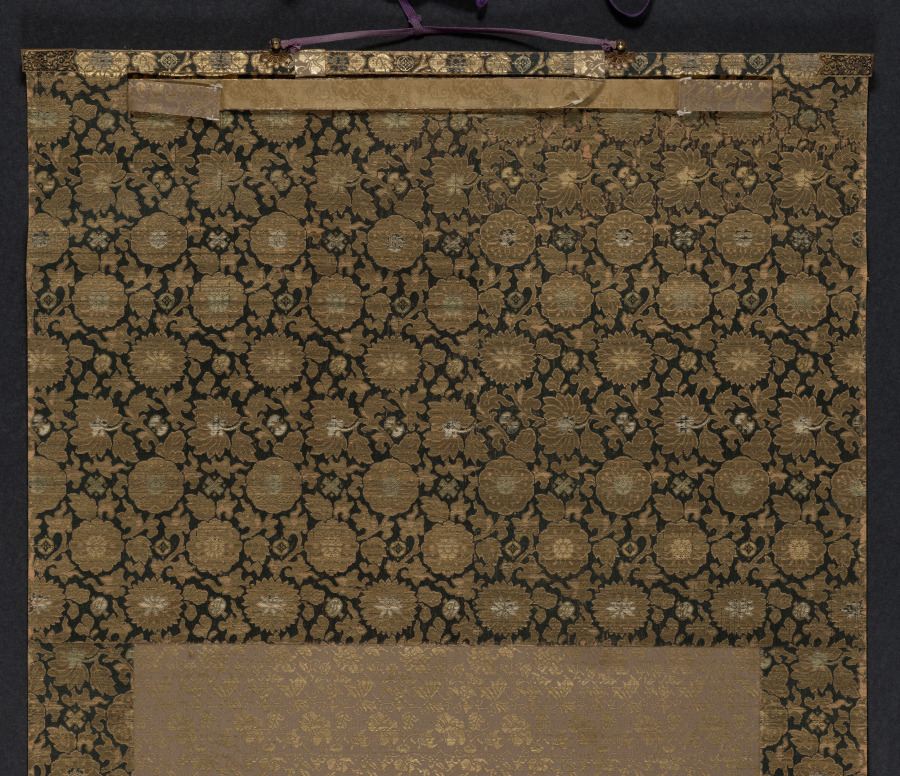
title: Seated Arhat with Two Attendants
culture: China, Southern Song dynasty (1127-1279)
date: late 1200s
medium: Hanging scroll; ink and color on silk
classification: Painting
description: Arhat, or Lohan (羅漢 in Chinese), were the disciples of the historical Buddha. Later tradition tended to picture them in sets of 16, 18, or as many as 500. This is one painting from a larger set, with a seated arhat portrayed on a grand scale, overshadowing his own attendant as well as the ferocious figure who approaches him with an offering of a wild goose.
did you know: The arhat holds a rolled up scroll, likely a sutra, and is seated before a standing screen decorated with a landscape painting.